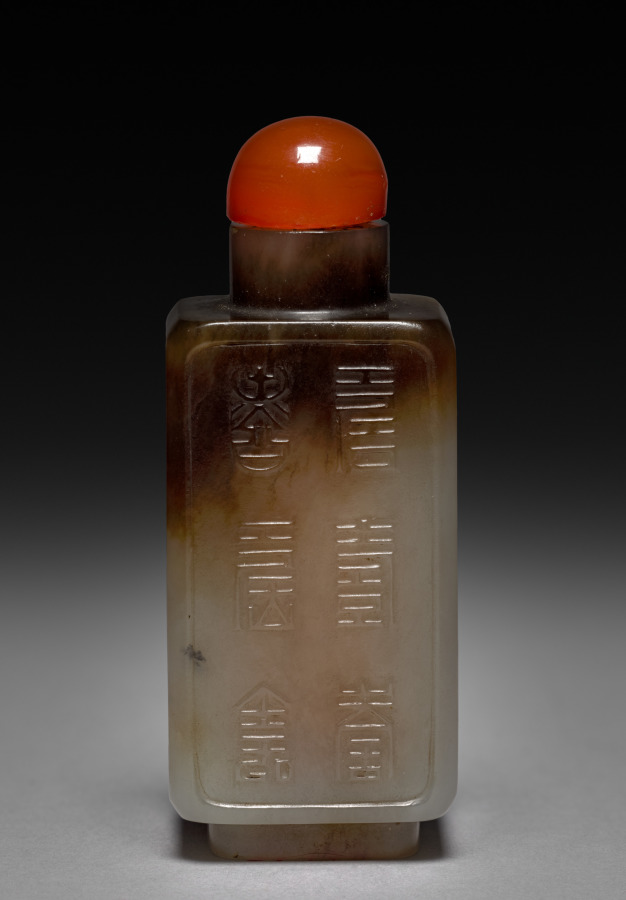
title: Snuff Bottle with Stopper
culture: China, Qing dynasty (1644–1911), Qianlong reign (1736–95)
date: 1736–95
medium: jade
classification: Jade